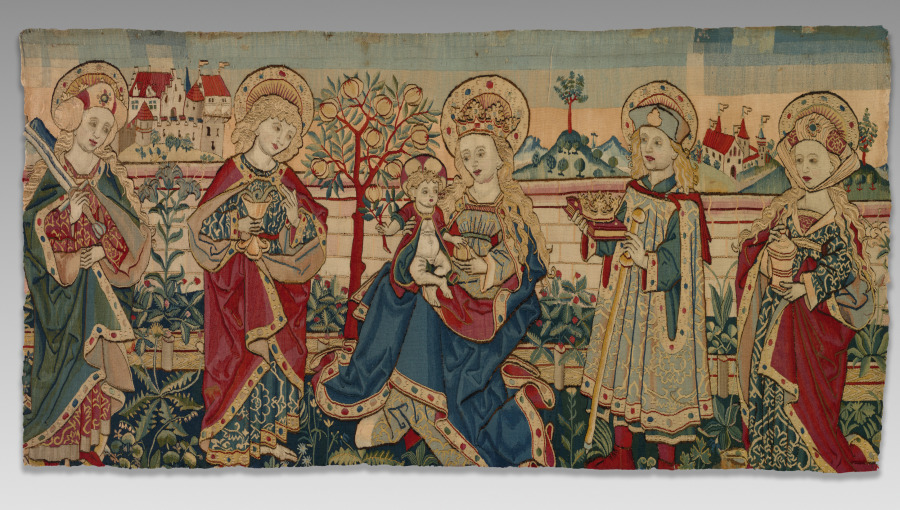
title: Virgin and Child with Four Saints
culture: Germany or Switzerland, Upper Rhine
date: c. 1500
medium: tapestry weave: linen warp, wool and silk wefts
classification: Tapestry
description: Mary and Jesus are seen in front of a wall in a garden that alludes to the Garden of Paradise. They are depicted between four saints: Saint Catherine, John the Evangelist, Jodocus, and Mary Magdalene. The saints wear costumes fashionable around 1475 to 1480. The hanging is said to come from the parish church in St. Lawrence in Nuremberg, Franconia, Bavaria, one of the most important in the commercial city. The appearance of Jodocus may indicate that the textile may have been donated by a wealthy citizen of the same name.